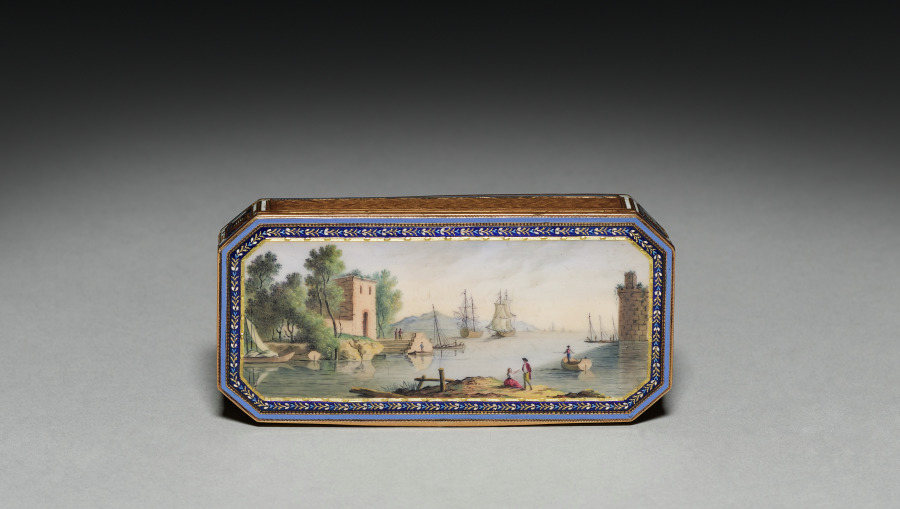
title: Box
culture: Switzerland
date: early 1800s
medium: gold and enamel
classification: Miscellaneous